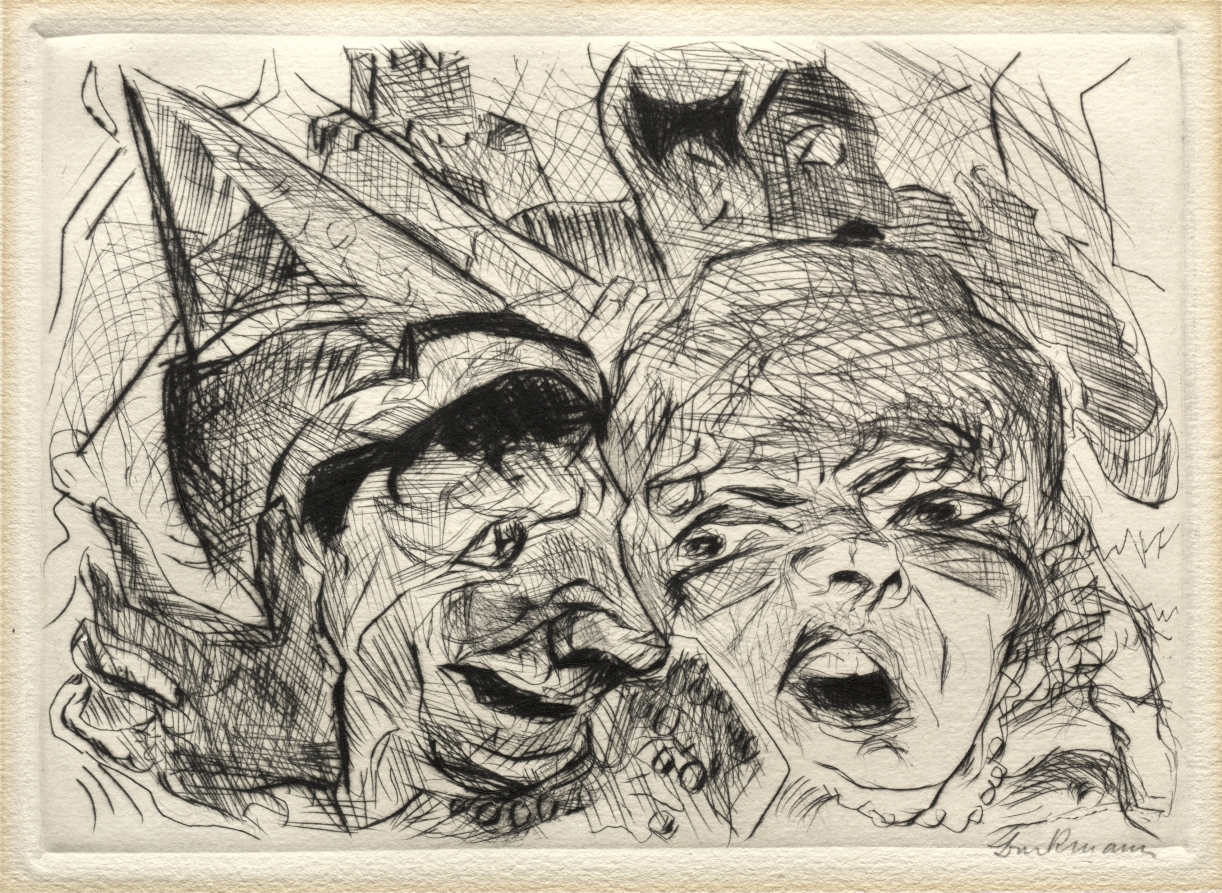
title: Theater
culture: Germany, 20th century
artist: Max Beckmann (German, 1884–1950)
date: 1916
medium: drypoint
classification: Print